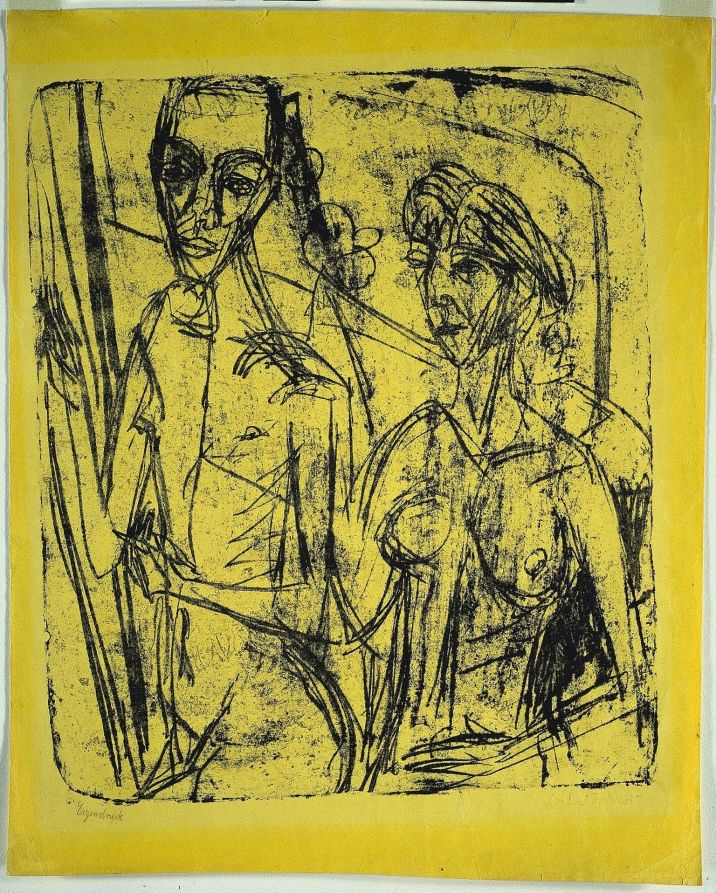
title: Couple in Room, Nude Man with Woman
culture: Germany, 20th century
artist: Ernst Ludwig Kirchner (German, 1880–1938)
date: 1915–16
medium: Lithograph on yellow paper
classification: Print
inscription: in pencil: Eigendruck, E. L. Kirchner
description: The man in this image resembles one of Ernst Ludwig Kirchner’s close friends, Hugo Biallowons, who was killed in World War I shortly after this print was made. Kirchner depicted the man in a cramped space next to a nude woman who reaches for him without making eye contact. The yellow paper suggests artificial light. Kirchner owned one large lithographic stone, from which he made one lithograph after another simply by sanding down the stone, and then starting again with a new composition. This resulted in very small editions. By spreading water mixed with turpentine over the surface of the stone to loosen the lithographic crayon, he created unexpected and spontaneous results, seen here in the grainy and broken lines.